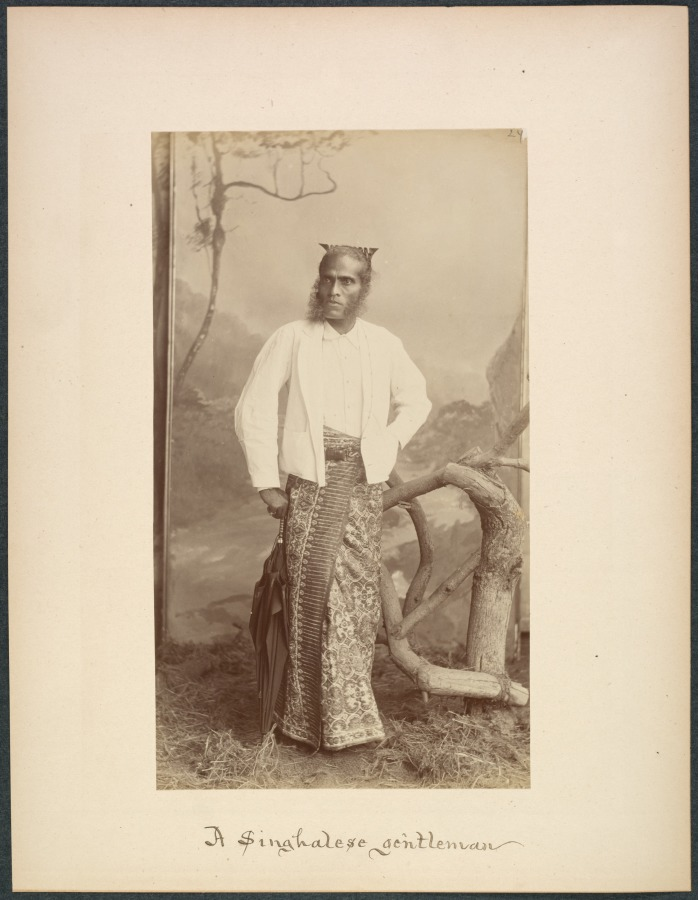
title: A Sinhalese Gentleman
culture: Sri Lanka, 19th century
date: c. 1880s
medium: albumen print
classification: Photograph